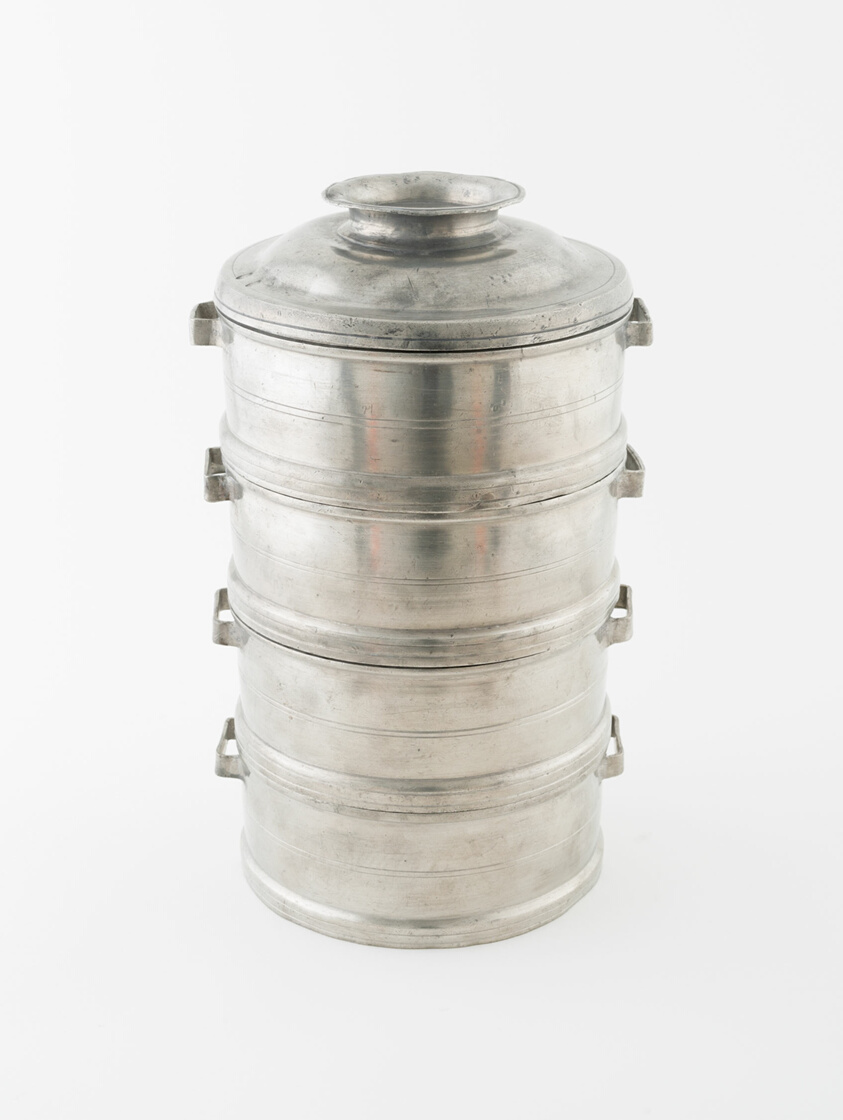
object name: Metalwork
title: Sectioned Food Can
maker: Southern Germany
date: 18th century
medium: Pewter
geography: Southern Germany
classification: pewter; metalwork; european decorative arts